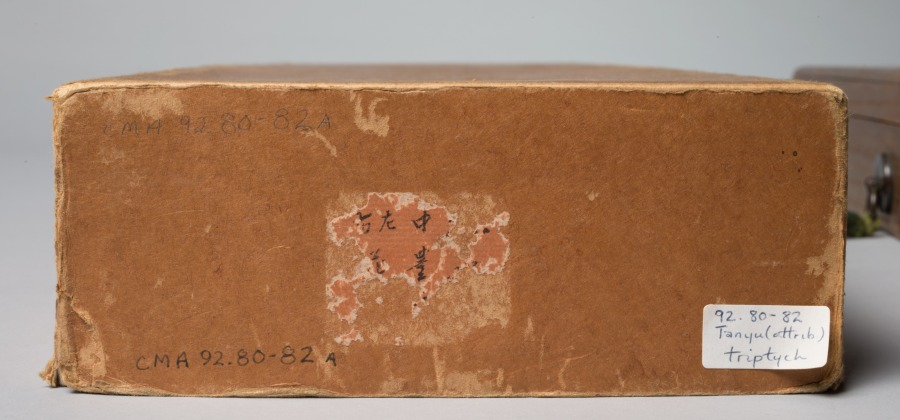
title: Sparrows on Blossoming Plum; A Sage with Tiger; Chinese Bird on Snow-Laden Branch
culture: Japan, Edo period (1615–1868)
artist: Kano Tan’yū (Japanese, 1602–1674)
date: 1661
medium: Triptych of hanging scrolls; ink and slight color on silk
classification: Painting